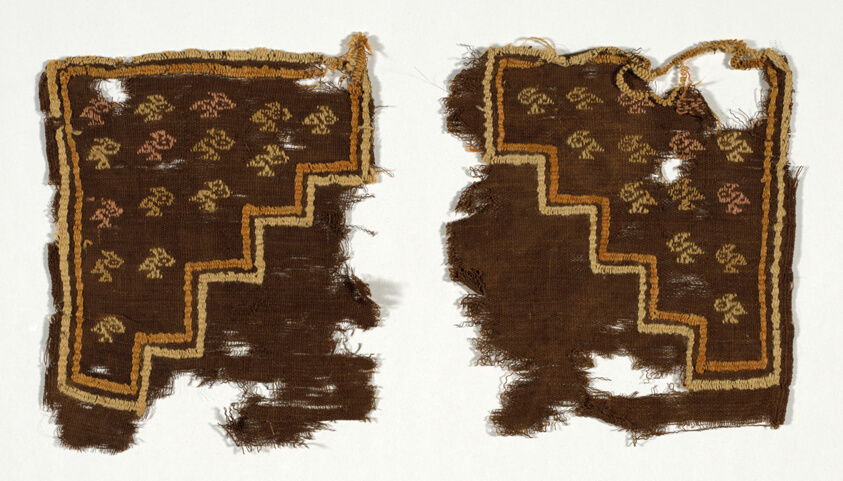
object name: Textile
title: Fragment (From Poncho)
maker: Possibly Santa Clara, Virú Valley, north coast, Peru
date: A.D. 1000/1532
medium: Simple cloth, embroidery in cotton.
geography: Peru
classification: textile; weaving